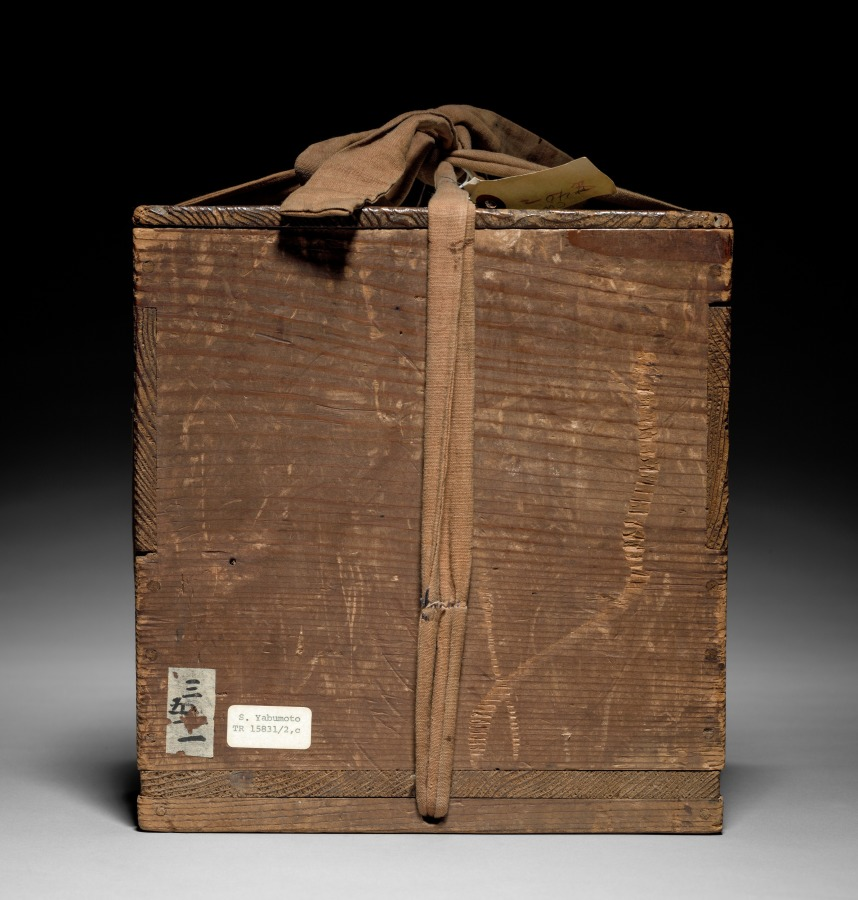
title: Water Container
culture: Japan, Momoyama period (1573–1615)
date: early 1600s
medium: glazed stoneware (Bizen ware, Imbe type)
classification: Ceramic